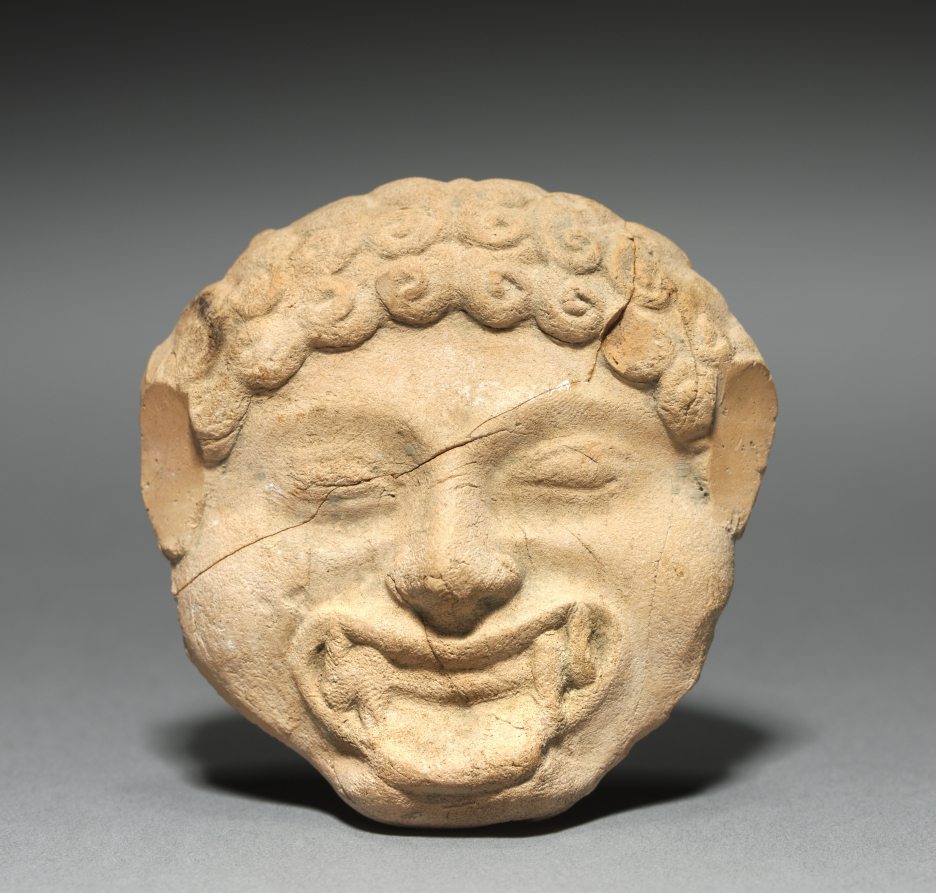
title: Gorgoneion Plaque with Incised Figure of a Dancing Satyr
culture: Greece, South Italy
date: c. 525–475 BCE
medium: terracotta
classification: Sculpture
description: Probably meant to decorate the outside of a wooden coffin or other tomb furniture, this small mold-made terracotta plaque is one of two in the collection (click here for the other). Both bear gorgoneia, or frontal Gorgon faces, with snaky hair, sharp teeth, and protruding tongue, perhaps meant to ward off evils. Curiously, this plaque also features decoration on its back side, in the form of a spirited dancing satyr incised into the clay before firing. Since this satyr would not have been visible once the plaque was in place, its purpose is uncertain. Was it simply diversion for the artisan who made it, or meant to protect the spirit of the deceased?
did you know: This plaque includes a very rare ancient sketch: a satyr incised on the reverse surface.